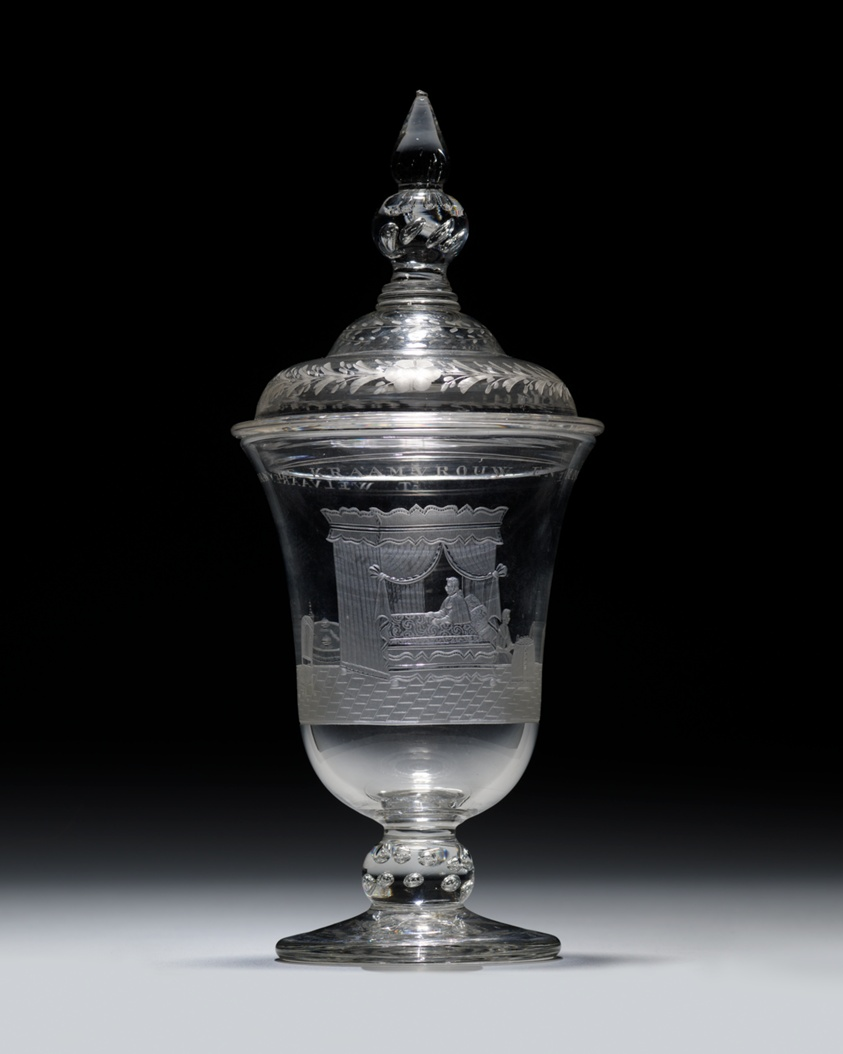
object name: Glass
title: Goblet with Cover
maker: Engraved by Jacob Sang (Dutch, born c. 1720); Amsterdam, Netherlands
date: 1750–70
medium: Lead glass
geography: England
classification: goblet; engraved; european decorative arts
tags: goblet